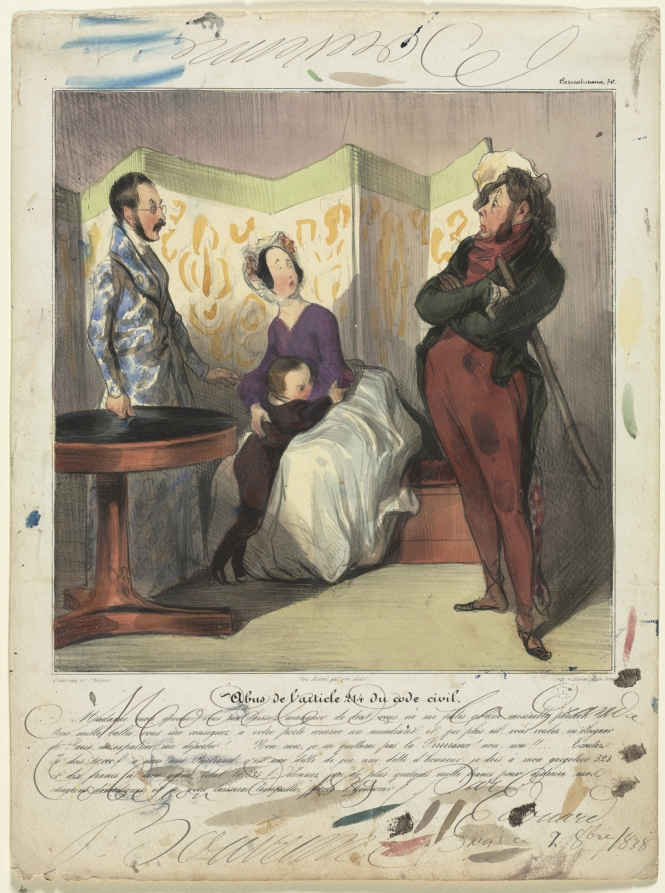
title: Breach of Article 24 of the Civil Code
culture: France, 19th century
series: Caricaturana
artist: Honoré Daumier (French, 1808–1879)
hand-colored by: Edouard Bouvenne (French)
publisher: Aubert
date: 1837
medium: lithograph hand-colored with watercolor by Edouard Bouvenne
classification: Print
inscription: Inscribed on the lower and upper margins, pen and brown/black ink: Modèle de la Grande Collection de 1839 par Edouard Bouvenne Paris a 2 8bre/ Bouvenne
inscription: Lower margin, printed: Daumier et Philipon / Chez Aubert, gal. véro dodat. / Imp. d'Aubert et de Junca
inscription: Above image, printed: Caricaturana, 50 ; below image, printed "Abus de lárticle 214 du code civil. / Madame mon épouse, vous me laissez manquer de tout, vous ne me faites qu'une misérable pension de / trois mille balles, vous me consignez à votre porte comme un mendiant, et, qui plus est, vous voulez m'eloigner / de Paris, m'expatrier, me déporter!..... Non, non, je ne quitterai pas la Frrrrrance! non, non !!...... Ecoutez: / je dois 10,000 f á mon ami Bertrand, c'est une dette de jeu, une dette d'honneur, je dois à mon gargotier 525 / et dix francs à mon garni, total 10,535 f; donnez moi de plus quelques mille francs pour distraire mes / chagrins domestiques et je vous laissarai tranquille, parole d'honneur!"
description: This print was published in Le Charivari (May 28, 1837) as plate 50 from the series Caricaturana.